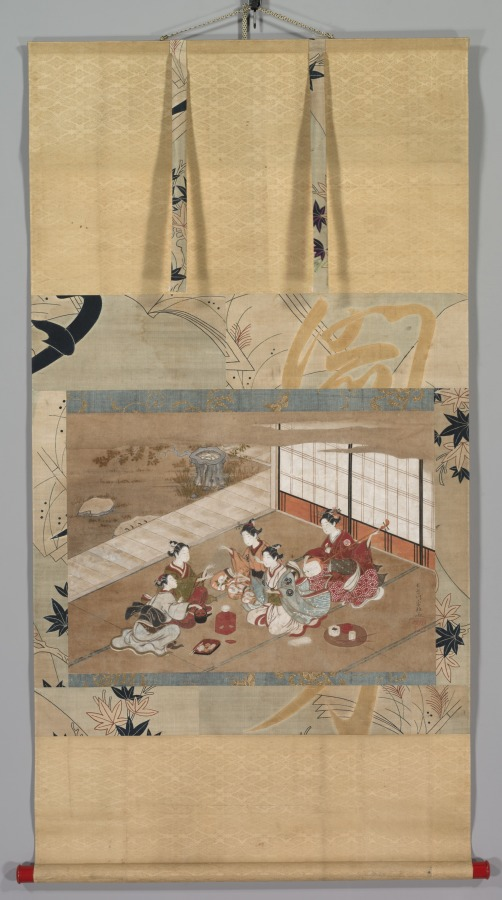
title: Playing the "Hand Game"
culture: Japan, Edo period (1615–1868)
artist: Hasegawa Yasumasa (Japanese)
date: c. 1760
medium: hanging scroll; ink and color on paper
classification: Painting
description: This scene depicts three people playing a game in which three players make hand gestures simultaneously. The relationship among the gestures determines the winner. Known as hand games, during the eighteenth century they were popular in Japan among courtesans. In this version, the contestants use both hands, indicating a special variation such as the fox hand game, which features gestures for a fox, a village leader, and a hunter.